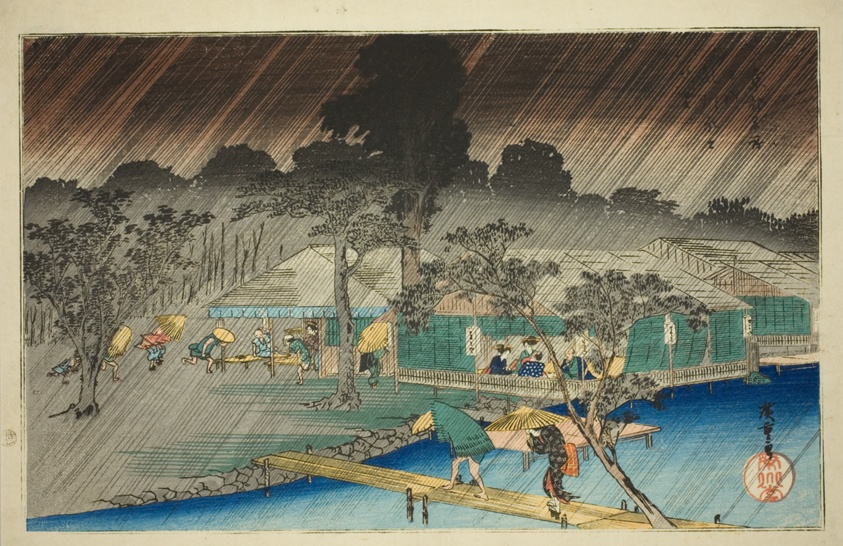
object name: Print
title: Evening Shower at the Bank of Tadasu River (Tadasugawara no yudachi), from the series "Famous Places in Kyoto (Kyoto meisho no uchi)"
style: Japanese (culture or style)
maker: Utagawa Hiroshige 歌川 広重; Japanese, 1797-1858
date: c. 1834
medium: Color woodblock print; oban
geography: Japan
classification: woodblock print; print; asian art